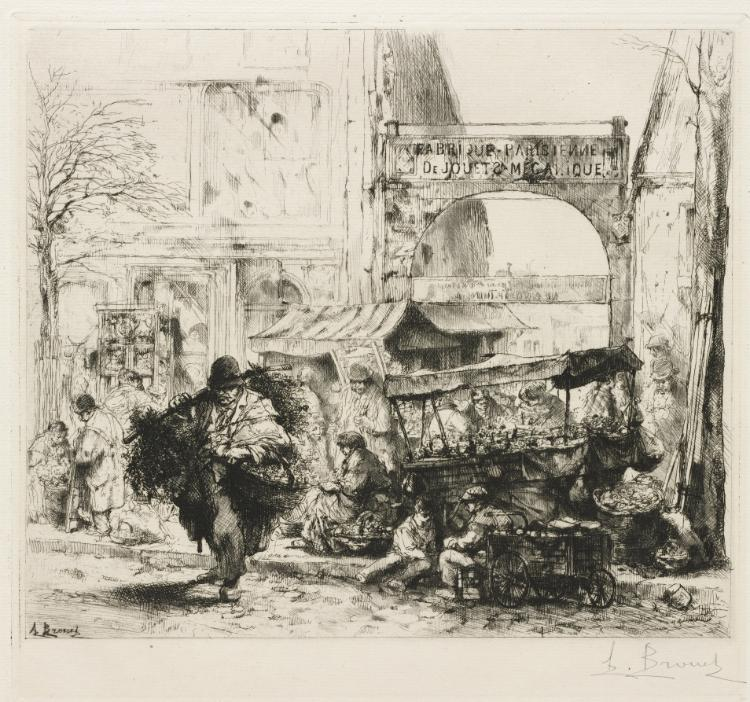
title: Une Matinee Avenue de Clichy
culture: France, 20th century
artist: Auguste Brouet (French, 1872–1941)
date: before 1925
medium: etching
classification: Print